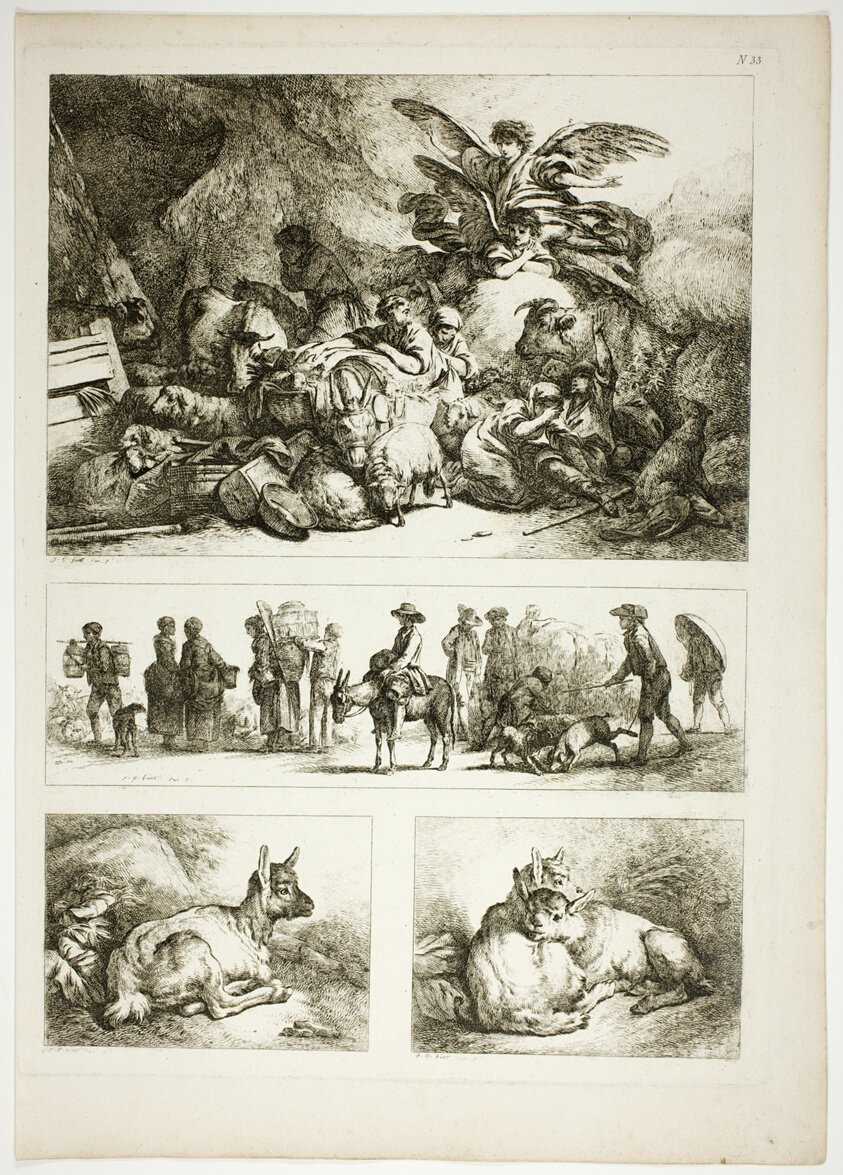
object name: Print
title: Plate 33 of 38 from Oeuvres de J. B. Huet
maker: Jean Baptiste Huet (French, 1745-1811)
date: 1796–99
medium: Etching on paper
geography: France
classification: etching; print; prints and drawing